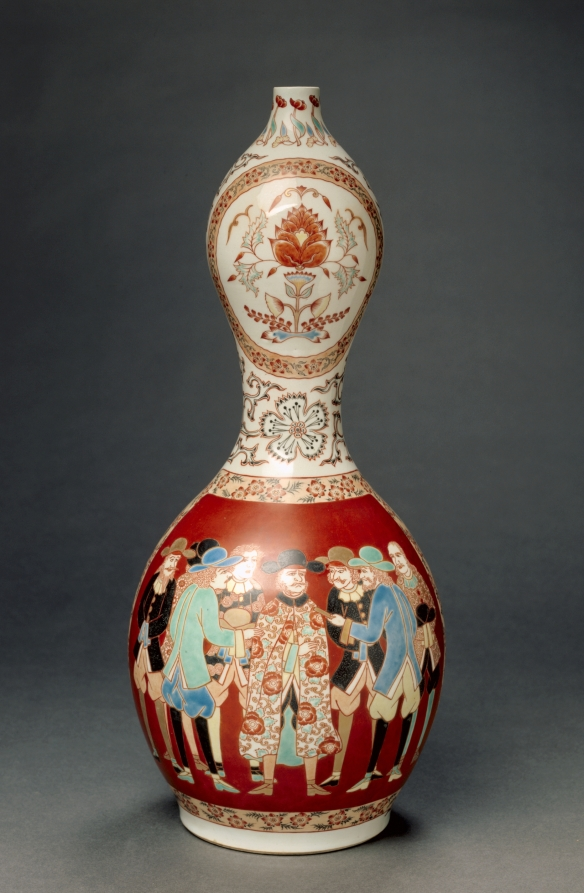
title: Bottle with Western Ships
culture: Japan, Edo period (1615–1868)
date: c. 1800–1868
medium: Porcelain with decoration in colored enamels and underglaze blue, overglaze enamels, and gold (Hizen ware, Arita type)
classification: Ceramic